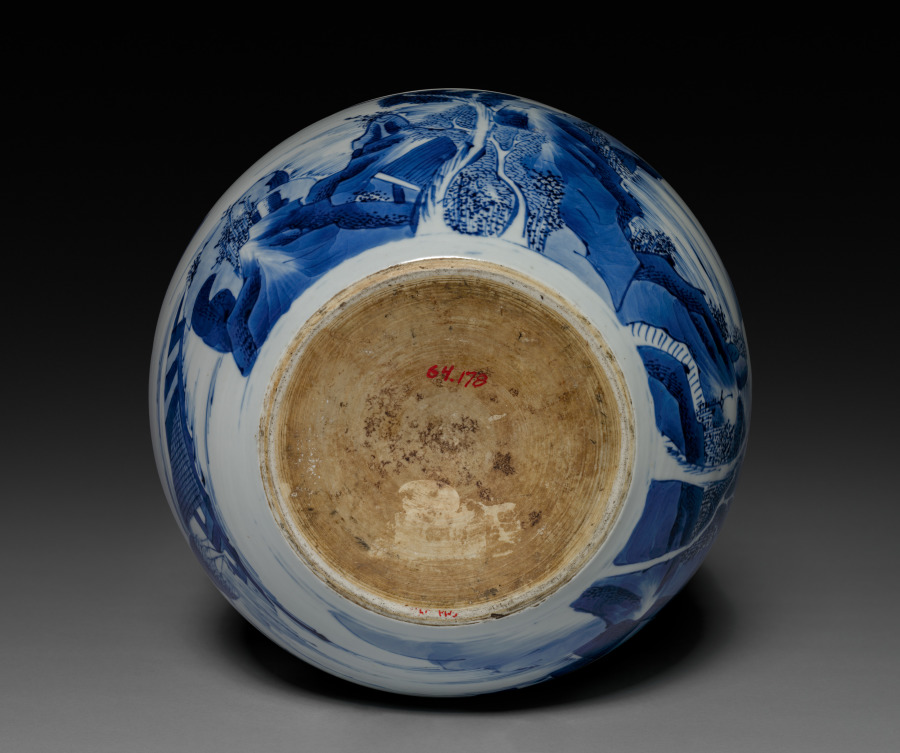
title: Pot with Landscape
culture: China, Jiangxi province, Jingdezhen kilns, Qing dynasty (1644-1911), Kangxi reign (1662-1722)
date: 1662–1722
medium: porcelain with underglaze blue decoration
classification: Ceramic